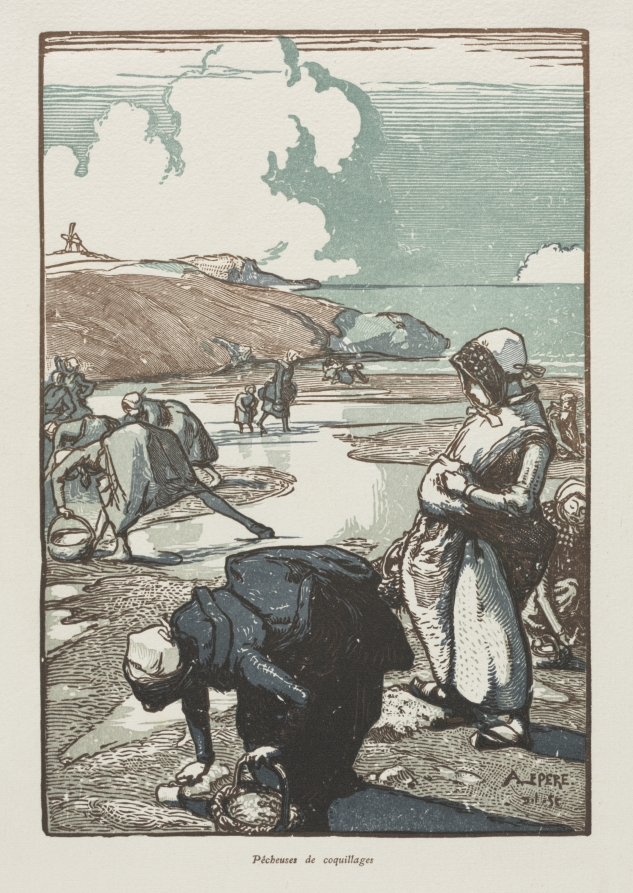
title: Les Pêcheuses de Pignons, Saint-Jean-de-Mont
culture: France, early 20th century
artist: Auguste Louis Lepère (French, 1849–1918)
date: 1903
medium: color woodcut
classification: Print